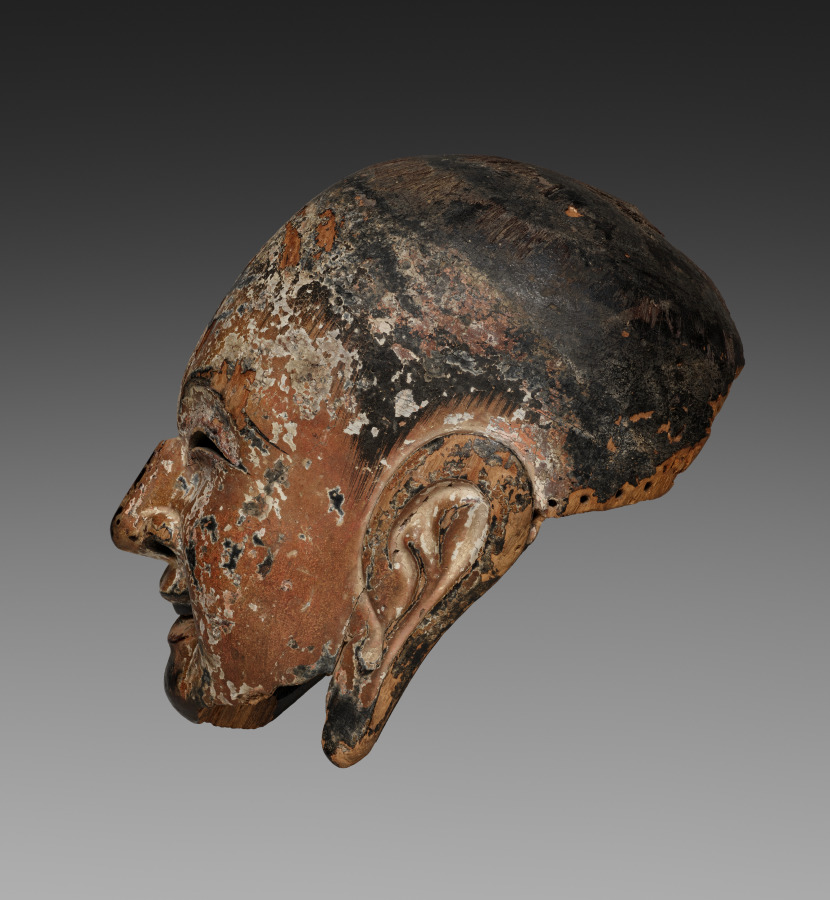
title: Gigaku Mask of Young Persian Boy (Taikōji)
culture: Japan, Nara period (710–94)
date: 710–94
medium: paulownia wood, lacquered and painted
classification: Sculpture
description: This mask is for the role of the son of an old Persian widower in gigaku, a theatrical dance repertoire imported to Japan from continental Asia during the seventh century. The old man and his sons mime prayers to the Buddha. While the mask would cover the entire head of the actor, there are openings for the eyes, nostrils, and mouth.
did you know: This is the mask for one of two sons who accompany a widower in ancient dance theater.